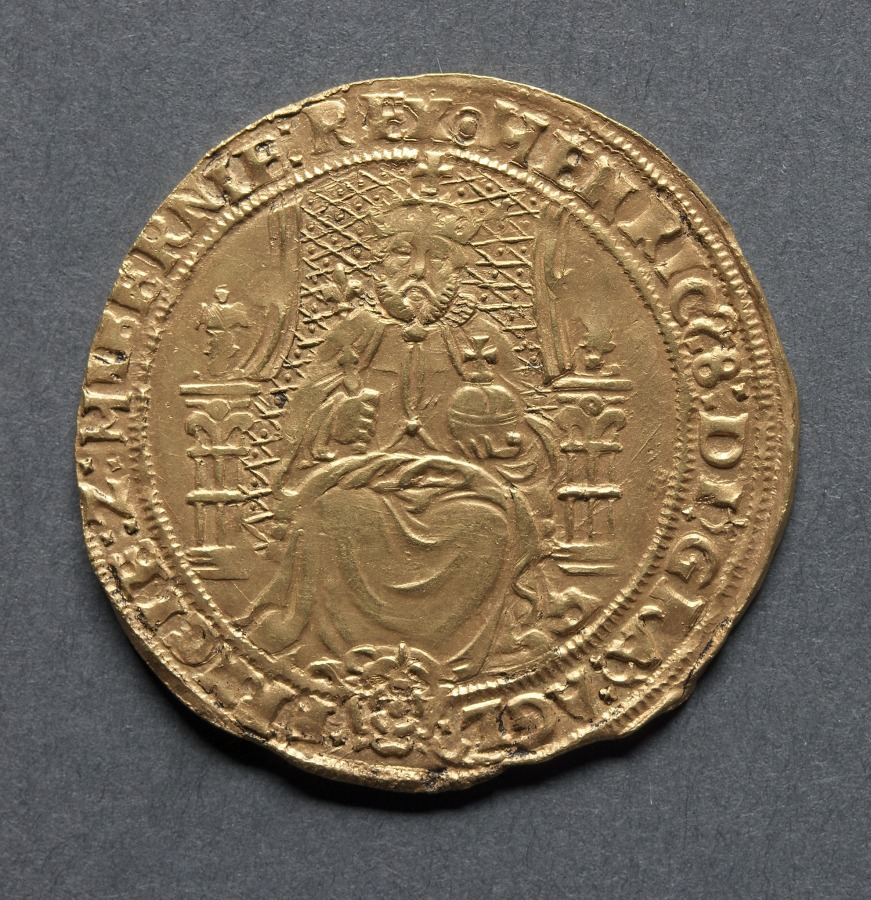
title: Half Sovereign: Henry VIII (obverse); Crowned Arms (reverse)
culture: England, Henry VIII, 1509-1547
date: 1544–47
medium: gold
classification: Coins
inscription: HENRIC. 8. DI. GRA. AGL FRNCIE Z. HIBERNIE REX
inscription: IHC. AVTEM PER MEDIVM ILLO RVM IBAT.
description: In this third coinage, a new portrait of the king appears. There is now an attempt to make the portrait lifelike, and we see the king fat and middle-aged compared to previous coinage such as 1969.170.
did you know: The half sovereign was first introduced in 1544 under Henry VIII and was valued at half a pound sterling or ten shillings.